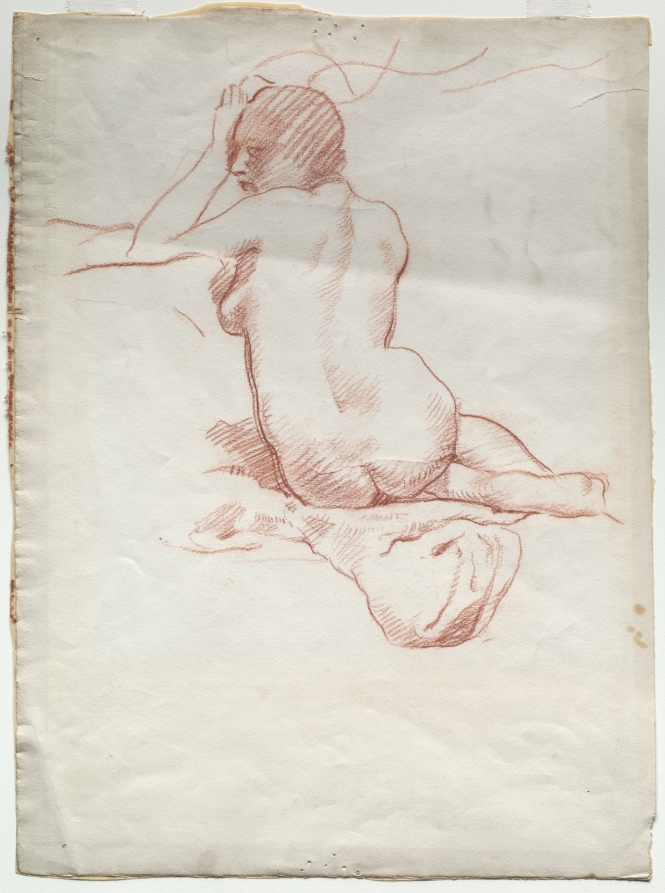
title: Seated Female Nude from the Rear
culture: England(?), 20th century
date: first half 1900s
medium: red chalk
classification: Drawing